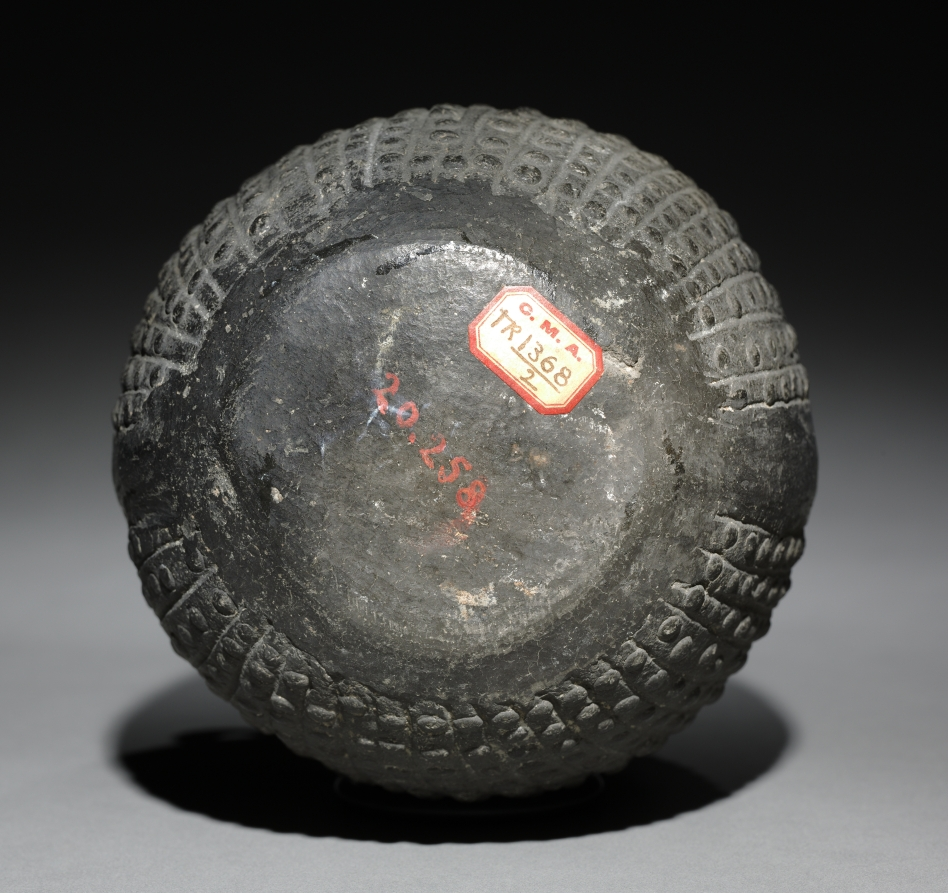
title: Darkware Vessel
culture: Peru, North Coast, Chimú style (900-1470)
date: late 1400s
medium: black ware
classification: Ceramic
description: Under the Chimú, whose empire stretched for 800 miles along the Peruvian north coast, the value of ceramics fell, perhaps because high-status vessels were made of precious metals. Accordingly, ceramics were mass-produced with molds and, rather than bearing painted scenes, often have an overall dark surface achieved by firing in a smoky atmosphere. This firing method was also used for very early Andean ceramics, including the example at the far left. We don't know whether the Chimú revived the method to venerate earlier cultures. The vessel with the stripped surface was made after the Chimú were conquered by the Inka in the late 1400s.